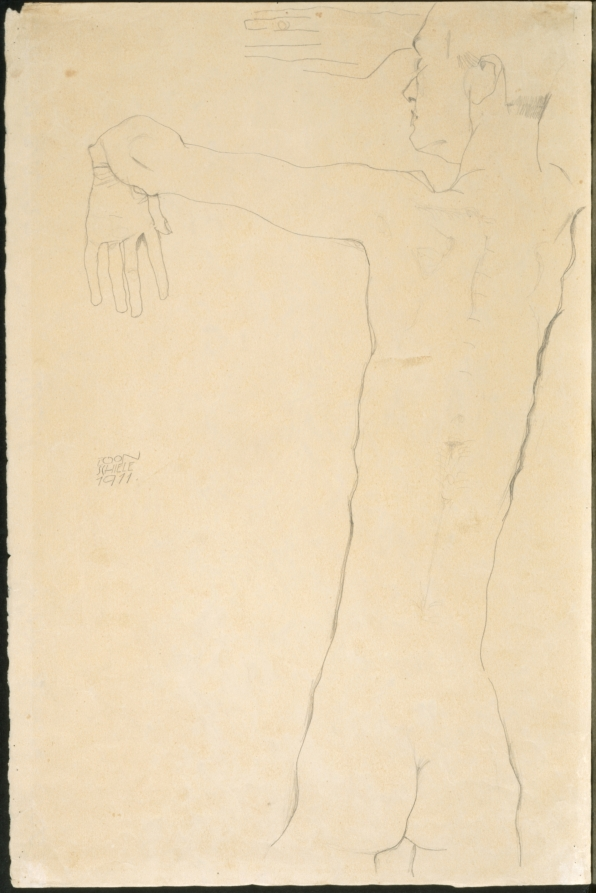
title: Nude Man with Raised Arms (recto)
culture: Austria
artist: Egon Schiele (Austrian, 1890–1918)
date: 1911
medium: graphite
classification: Drawing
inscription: signed, left center, in graphite: EGON / SCHIELE / 1911.